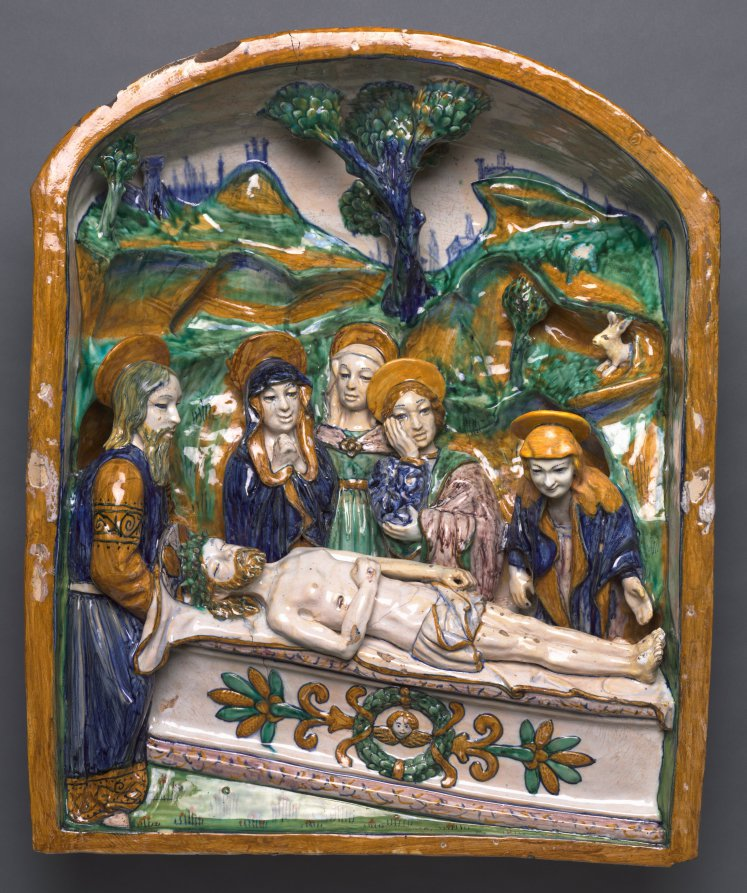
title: The Entombment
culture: Italy, Faenza, 15th century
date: late 1400s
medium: glazed terracotta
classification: Ceramic